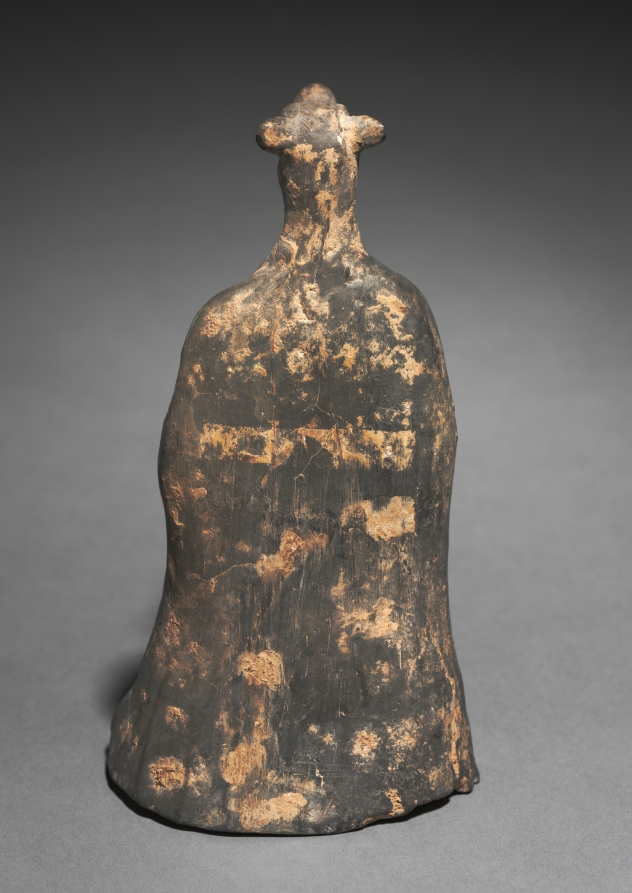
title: Mortuary Figure of the Zodiac Sign: Boar (Pisces)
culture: China, Northern Wei dynasty (386-534)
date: 500s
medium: gray earthenware with traces of slip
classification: Sculpture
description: The twelve-animal zodiac series—rat, ox, tiger, rabbit, dragon, snake, horse, goat, monkey, rooster, dog, and boar—signifies a traditional Chinese concept of time structured in a cyclical order. The twelve animals are also linked to the art of fortune-telling that underlies human existence in connection with the changes of the universe. The use of the twelve zodiac animals as tomb furniture suggests they provided a cosmological structure for the afterlife.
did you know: This figure with the head of a boar was originally painted with red and brown slip over a layer of white slip.